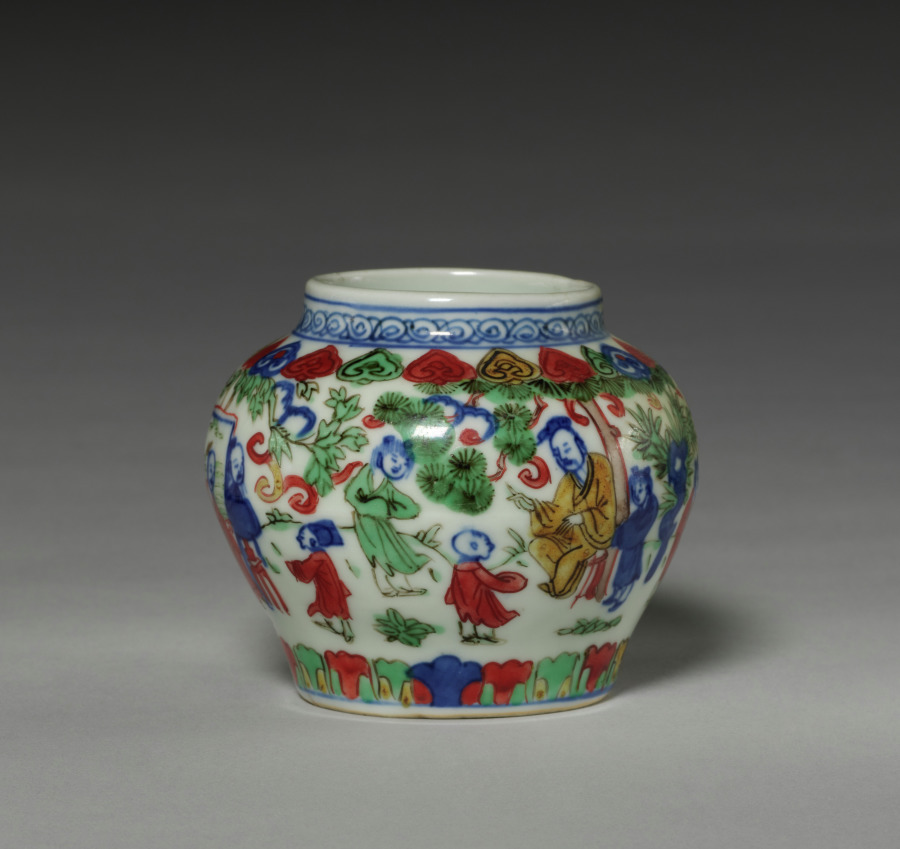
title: Covered Jar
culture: China, Jiangxi province, Jingdezhen kilns, Ming dynasty (1368-1644), Wanli reign (1573-1620)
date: 1573–1620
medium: porcelain with blue underglaze decoration and overglaze enamels in red, green, and yellow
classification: Ceramic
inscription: 大明萬曆年製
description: In the Ming (1368–1644) and Qing (1644–1911) dynasties, luxury items became more affordable to larger parts of the society, including women, merchants, and literati in non-official positions. Imperial patronage and a growing urban population encouraged consumption of luxury goods and local craftmanship. This covered porcelain jar has blue underglaze and overglaze in red, green, and blue enamels. It shows Ming dynasty advancements in porcelain decoration and the creative mind of the talented artisans who made it.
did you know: This jar is painted with 16 figures of all ages enjoying a garden setting.